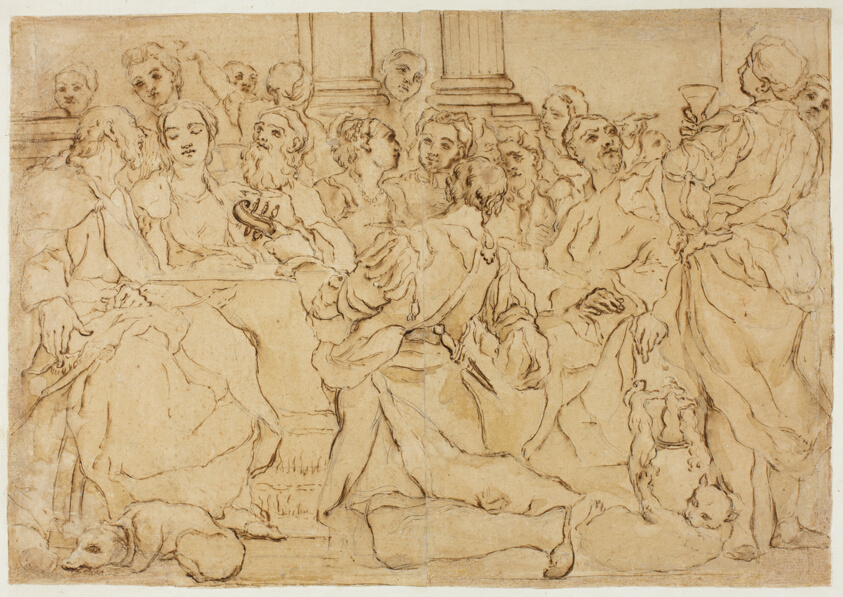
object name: Drawing and Watercolor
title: Study for the Marriage at Cana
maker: Attributed to Giuseppe Maria Crespi (Italian, 1665-1747); after Giuseppe Maria Crespi (Italian, 1665-1747)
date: c. 1688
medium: Pen and brown ink with brush and brown wash, over black chalk, on tan laid paper, laid down on Japanese paper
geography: Italy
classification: pen and ink drawings; drawings (visual works); prints and drawing